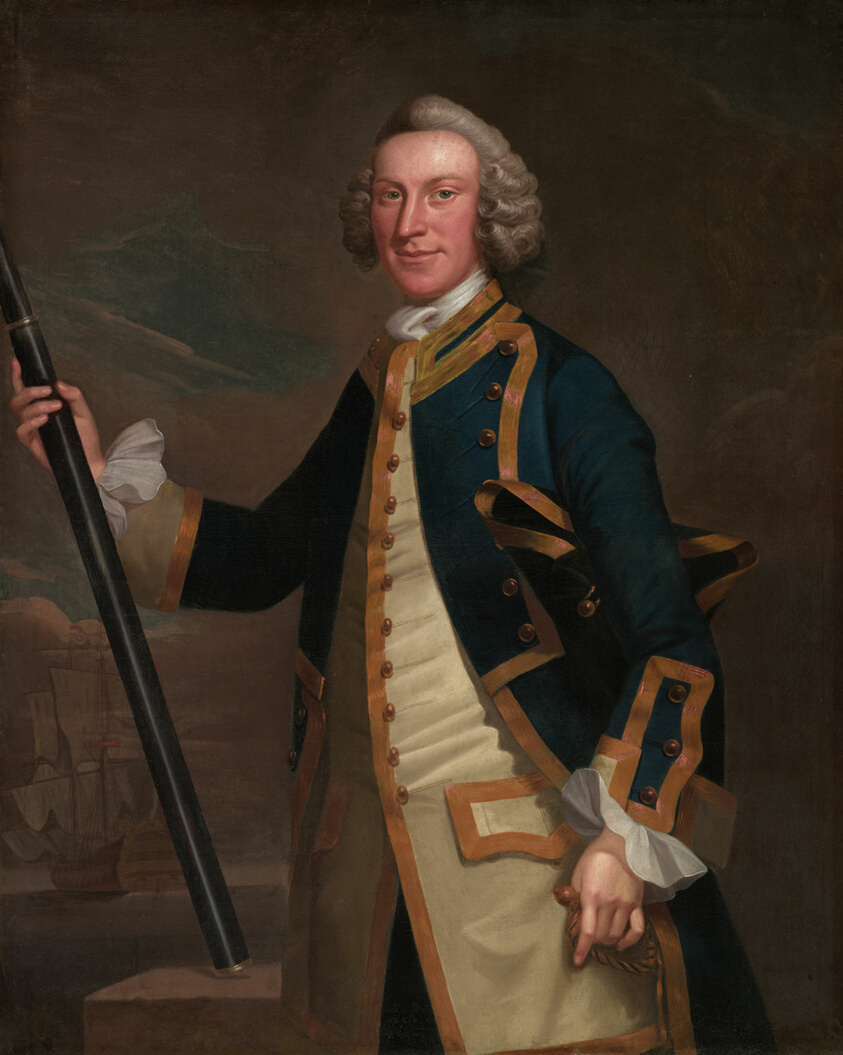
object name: Painting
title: Portrait of a Naval Officer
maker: John Wollaston (American, born England, c. 1710–c. 1775)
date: 1749–58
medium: Oil on canvas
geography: United States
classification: painting; american arts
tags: fashion, people, portraits